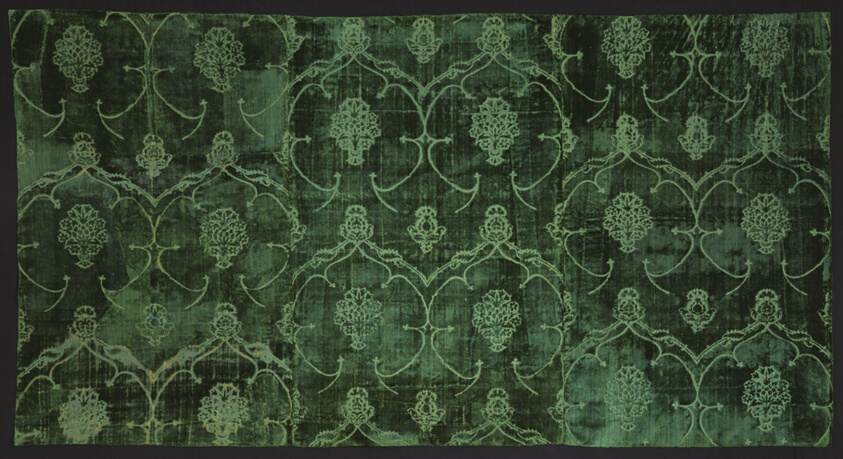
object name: Religious/Ritual Object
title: Altar Frontal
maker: Italy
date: 1450/1500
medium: Silk, warp-float faced 4:1 satin weave with supplementary pile warps forming cut, voided velvet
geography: Italy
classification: textile; weaving - velvet; liturgical; ritual objects